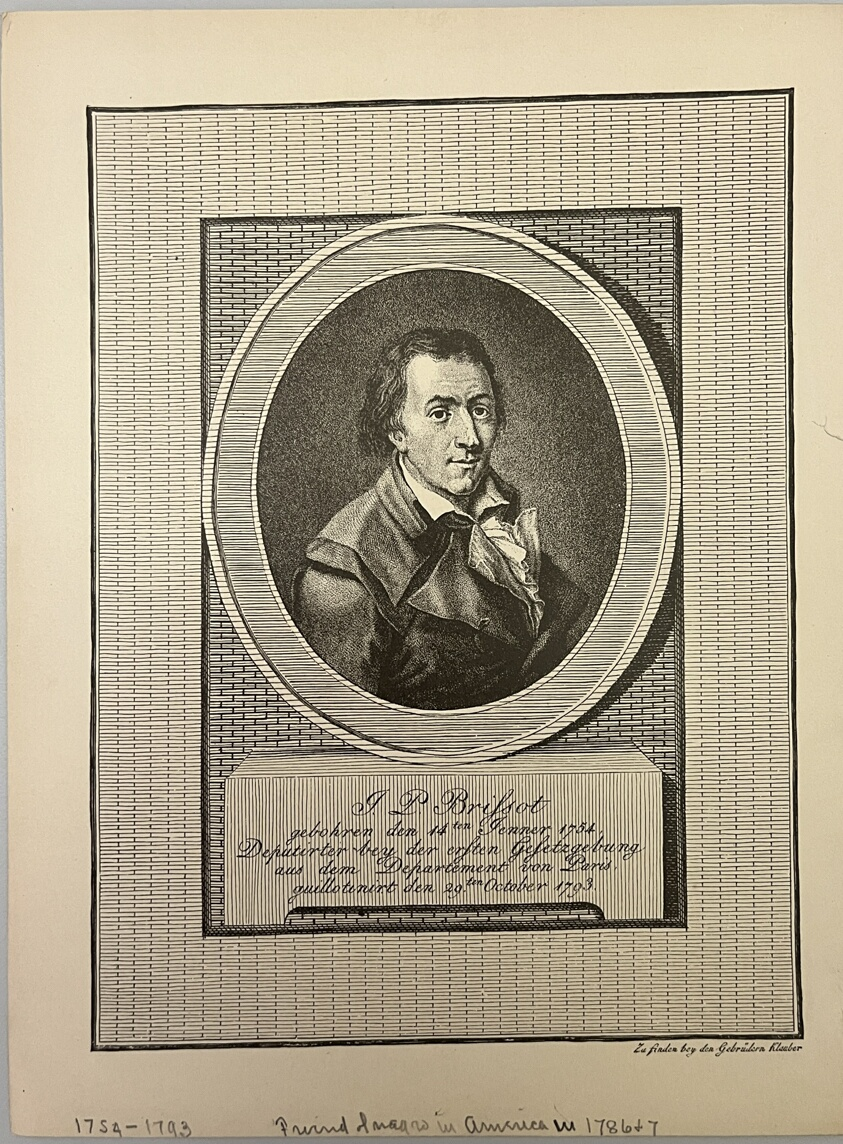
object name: Print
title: Jacques Pierre Brissot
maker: Klauber Brothers (German, 18th century)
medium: Photolithograph on paper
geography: Germany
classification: reproduction; print; prints and drawing